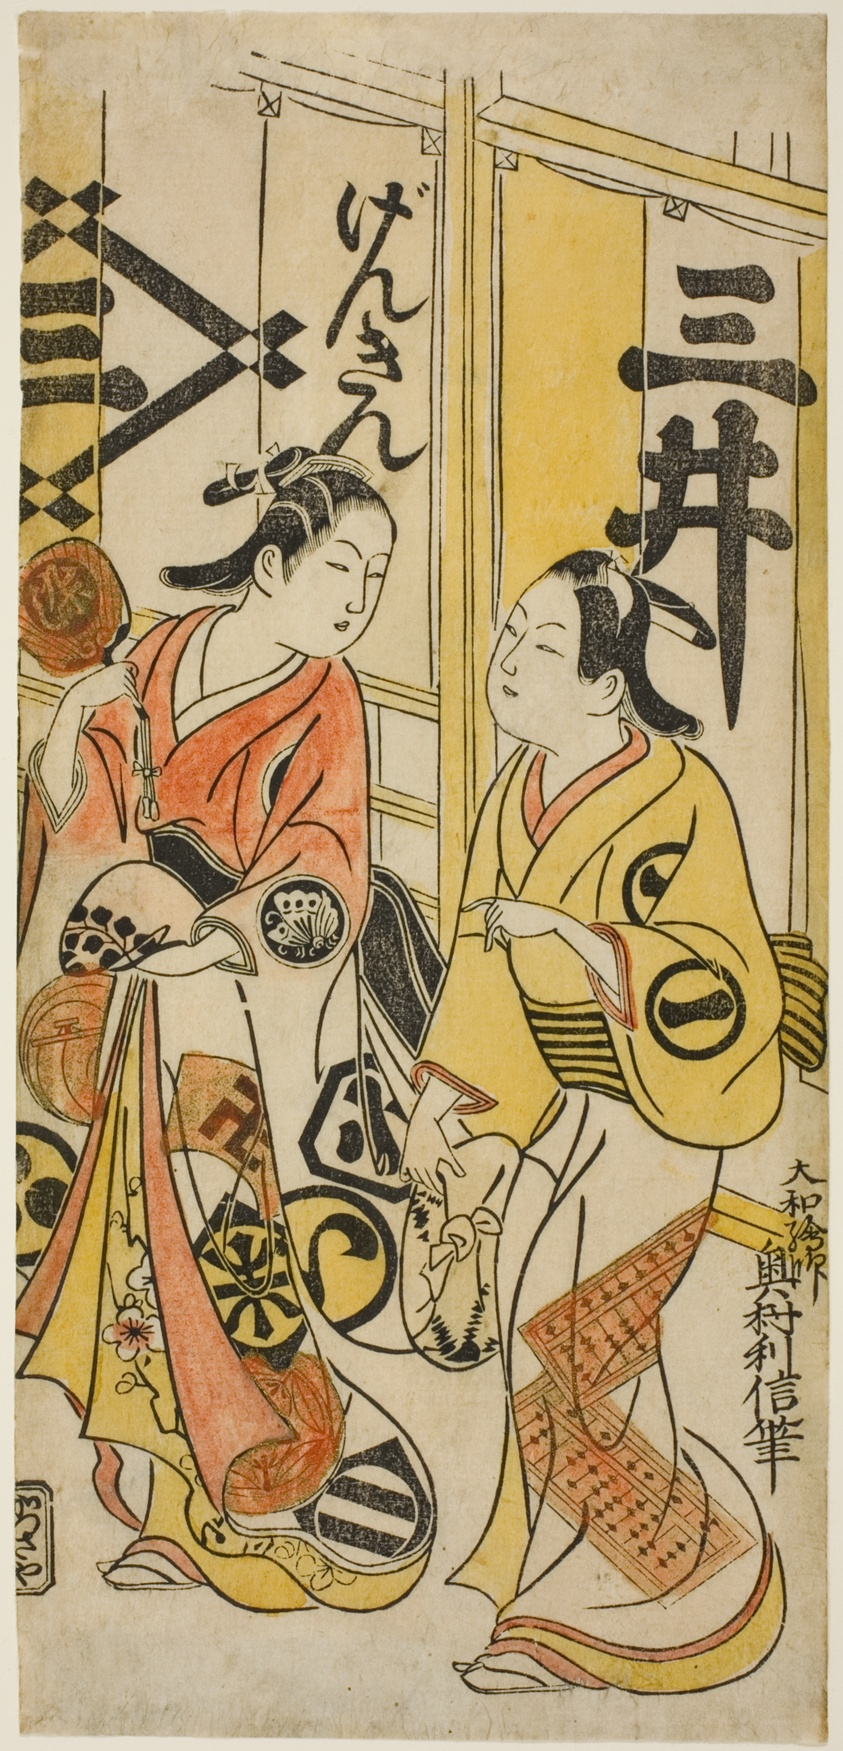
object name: Print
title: The Actors Sanjo Kantaro II as Osome and Ichikawa Monnosuke I as Hisamatsu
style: Japanese (culture or style)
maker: Okumura Toshinobu (Japanese, active c. 1717–50)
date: 1720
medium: Hand-colored woodblock print; hosoban, beni-e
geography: Japan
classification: woodblock print; print; asian art